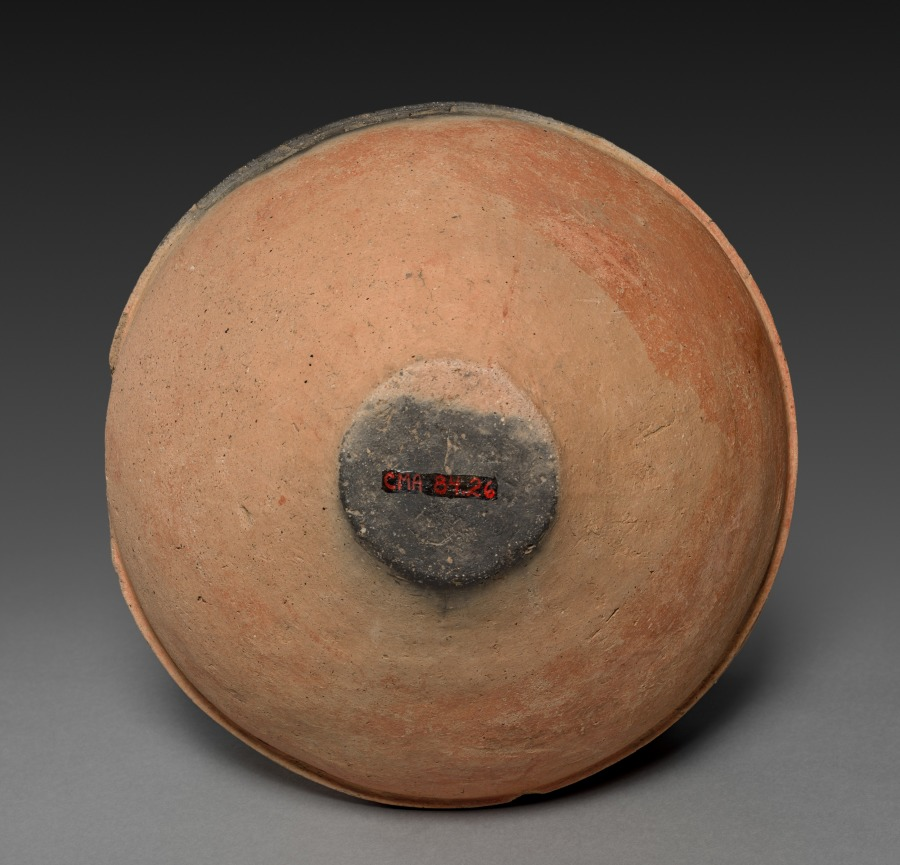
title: Jar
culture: Japan, Yayoi period (c. 300 BCE–300 CE)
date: c. 100 BCE–100 CE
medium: burnished earthenware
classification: Ceramic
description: The banding around this jar’s upper portion is an unusual feature for Yayoi pottery, which usually has a flat surface. It was likely made in western Japan, between Seto in Aichi prefecture and Kyushu, the southernmost main island. It is not believed to be a cooking vessel, but may have been used for storage. The ash spots occurred naturally during firing.